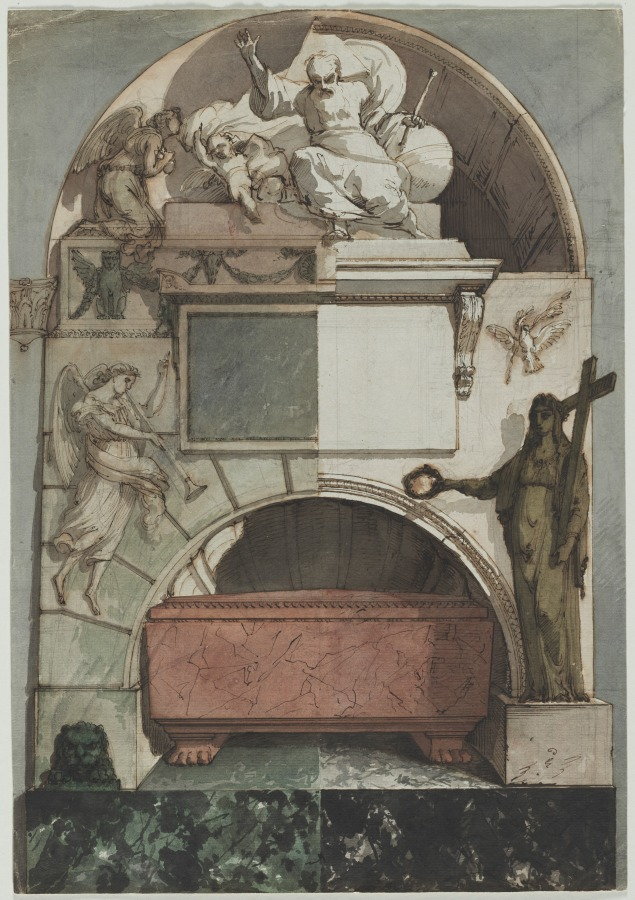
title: Design for a Fresco of an Artist's Tomb in the Certosa of Bologna (recto); Architectural Drawing of Columns (verso)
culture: Italy, 19th century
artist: Pietro Fancelli (Italian, 1764–1850)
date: c. 1810–1820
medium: pen and brown ink and watercolor with graphite under drawing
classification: Drawing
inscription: Verso, upper right, in graphite: "316" verso, in graphite: "20 Fancelli (?) 8/1000"